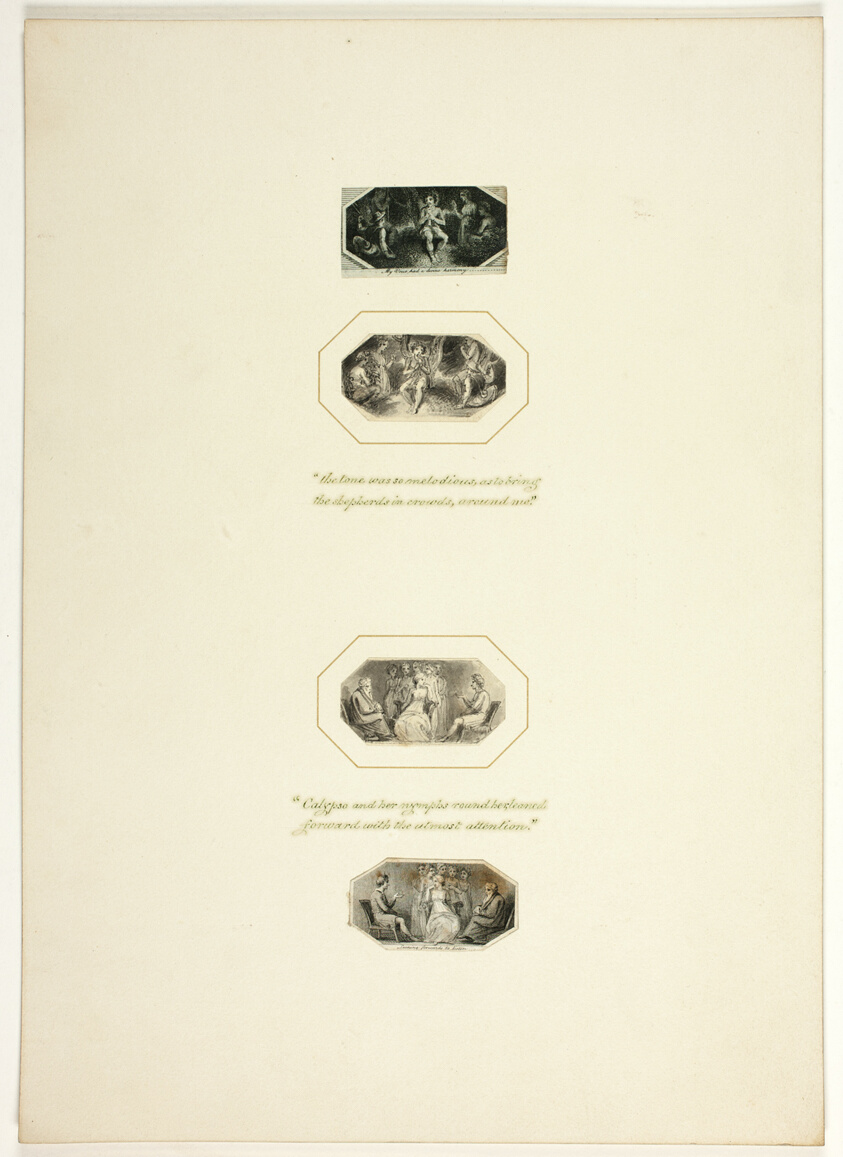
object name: Print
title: Plate from Telemachus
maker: after Thomas Stothard (English, 1755-1834); published by T. Baker (English, 19th century)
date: c. 1797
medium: Engraving on paper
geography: England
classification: engraving; print; prints and drawing